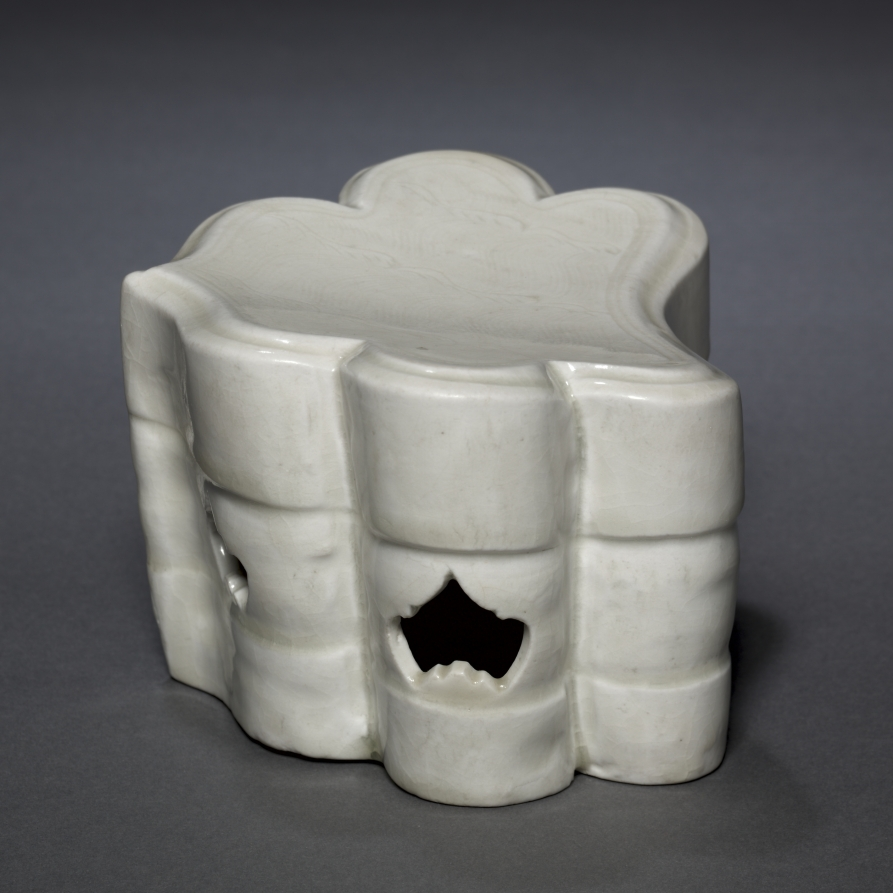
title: Cloud-Collar Pillow with Waves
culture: China, Jiangxi Province, Northern Song dynasty (960–1127)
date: 1000s–1100s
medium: glazed porcelain with incised and carved decoration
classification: Ceramic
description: This ceramic pillow in the form of a cloud—a design pattern variously referred to as ruyi, the shape of a head of an auspicious scepter—is a fine example of qingbai ware from Jiangxi province. It has a pure white body covered with a transparent, glassy glaze that carries a faint greenish tinge, thus giving it another name, yingqing, or "shadow blue." On the surface of the pillow is a carved and incised design of repeating wave patterns. The beauty of this piece lies in its elegance of form, simplicity of design, and delicacy of workmanship.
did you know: While ceramic might not be your choice for a pillow, it actually kept the user cool as they slept.